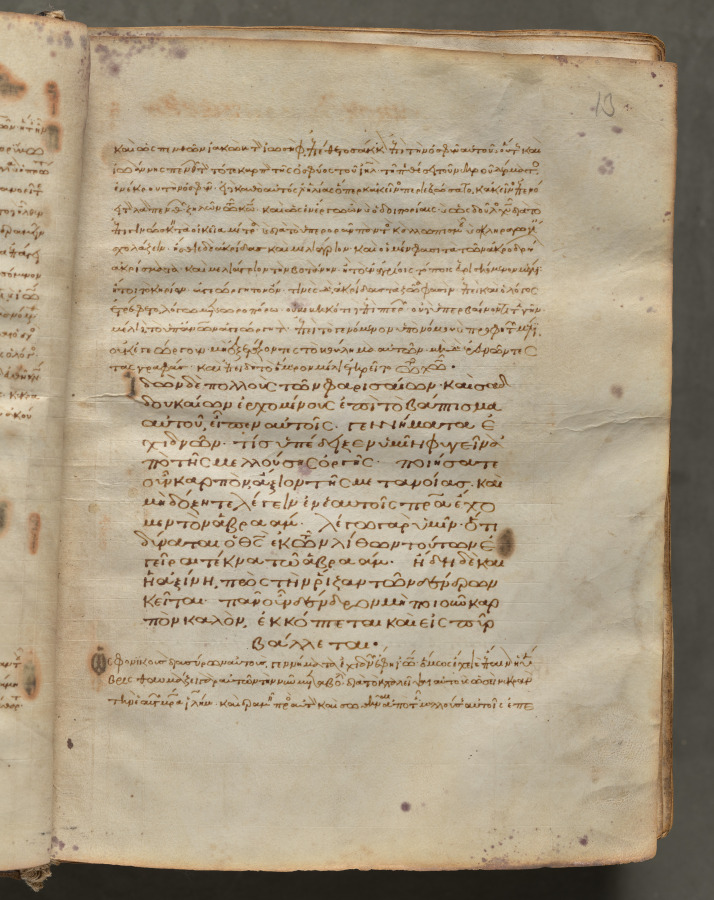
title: Text, folio 13 (recto), from a Gospel Book with Commentaries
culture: Byzantium, Constantinople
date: c. 1000–1100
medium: ink, tempera, and gold on vellum; leather binding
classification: Bound Volume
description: Each of the four gospels in this book opens on a page with brilliantly illuminated borders depicting the author of the text as well as birds-principally peacocks, symbols of the immortality of the soul-and fountains, representing the fountain of life and the salvation of the soul. This volume consists of 428 leaves with texts in Greek. Its level of sophistication suggests that it was probably written and decorated in a monastery in Constantinople.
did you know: Gospel Books were carried in procession through Byzantine churches.